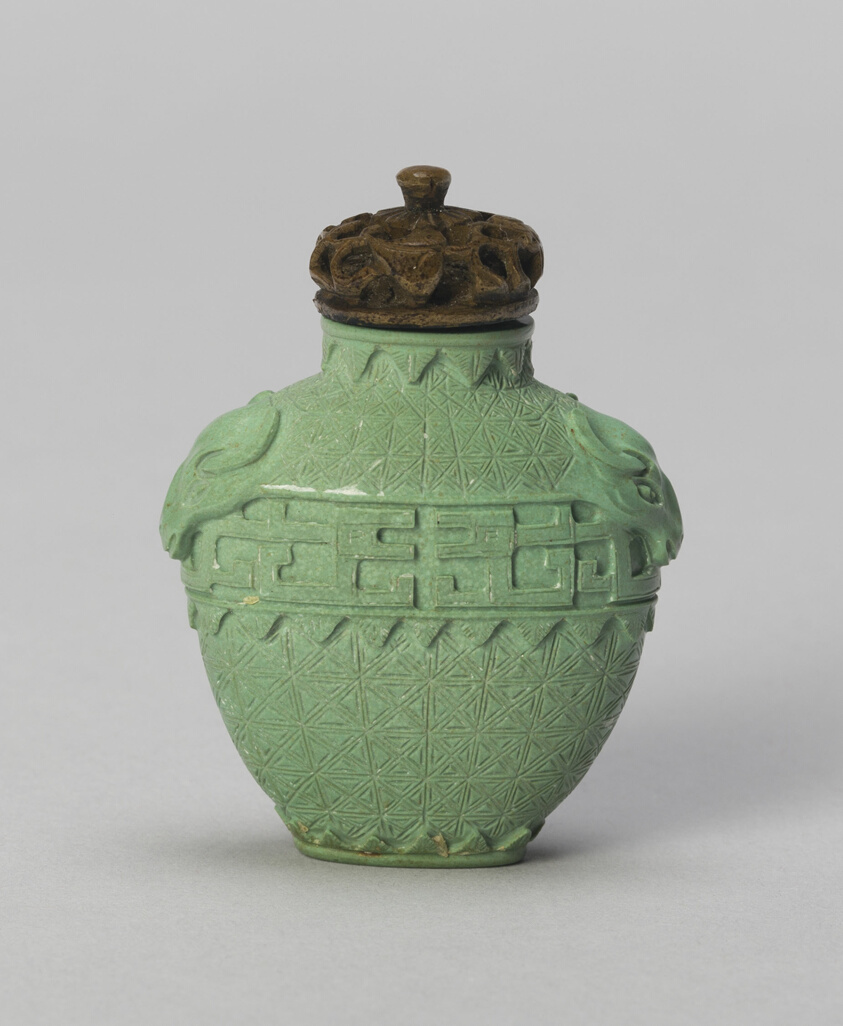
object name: Vessel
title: Spade-Shaped Snuff Bottle with Mock Ox-Head Handles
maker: China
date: Qing dynasty (1644–1911), 1780–1880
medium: Turquoise with carved decoration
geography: China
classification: snuff bottle; asian art; vessel